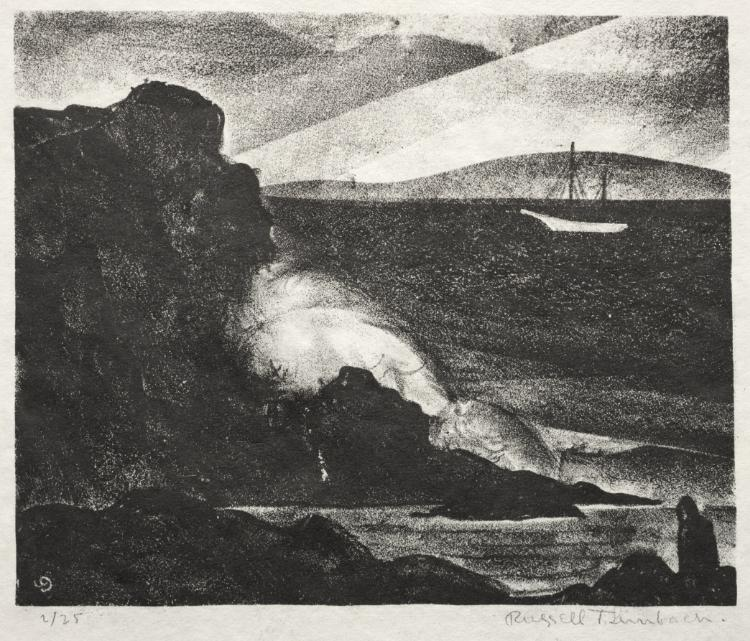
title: The Wave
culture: America, Ohio, Cleveland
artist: Russell T. Limbach (American, 1904–1971)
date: c. 1927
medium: lithograph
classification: Print